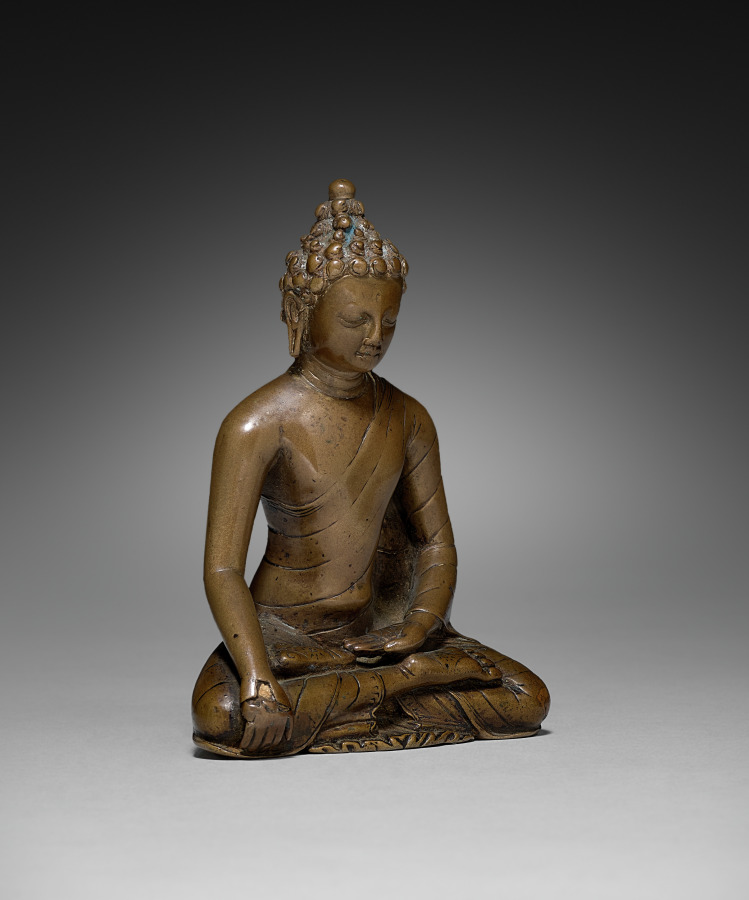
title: Seated Buddha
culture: India, Bengal(?), Pala period, 9th century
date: 800s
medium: bronze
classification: Sculpture